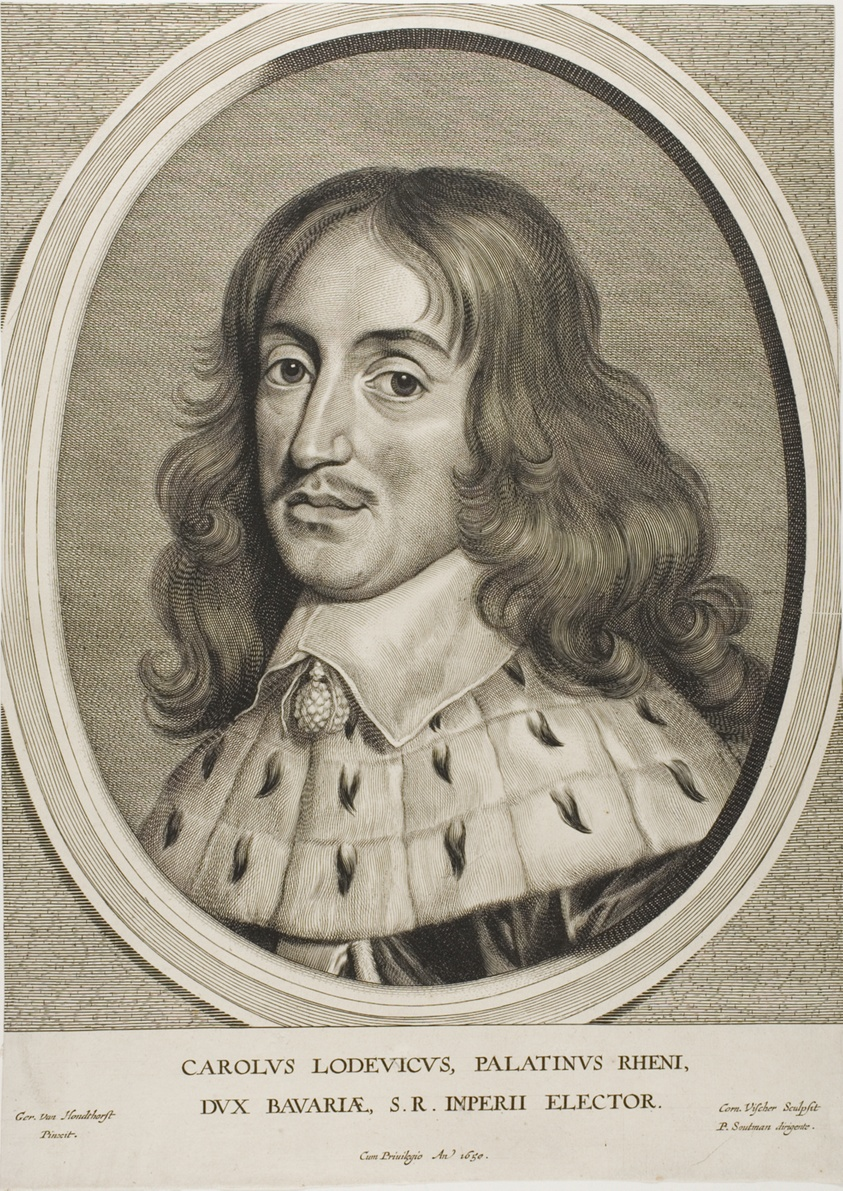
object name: Print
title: Charles Louis, Count Palatine, from Effigies Variae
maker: Cornelis Visscher (Dutch, c. 1629-1658); after Gerrit van Honthorst (Dutch, 1590-1656)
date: 1650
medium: Engraving on paper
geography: Holland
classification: engraving; print; prints and drawing